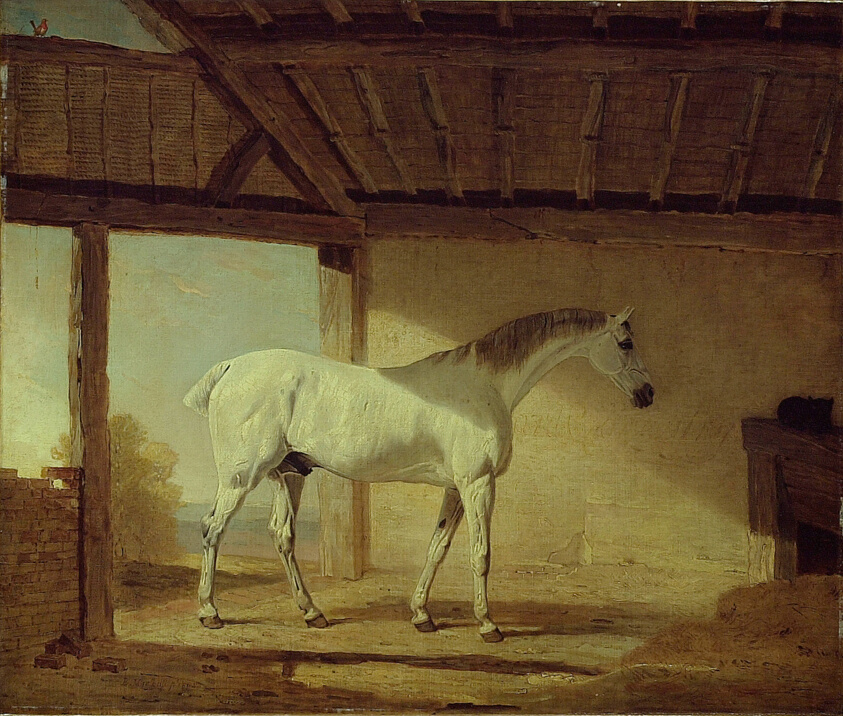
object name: Painting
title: The Earl of Coventry's Horse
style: nineteenth century, 19th century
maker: Benjamin Marshall (English, 1767–1835)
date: 1805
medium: Oil on canvas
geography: England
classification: oil on canvas; oil paintings (visual works); paint; british; painting; european painting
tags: horse, wall, trees, sky, portrait, nobility, horses, animals